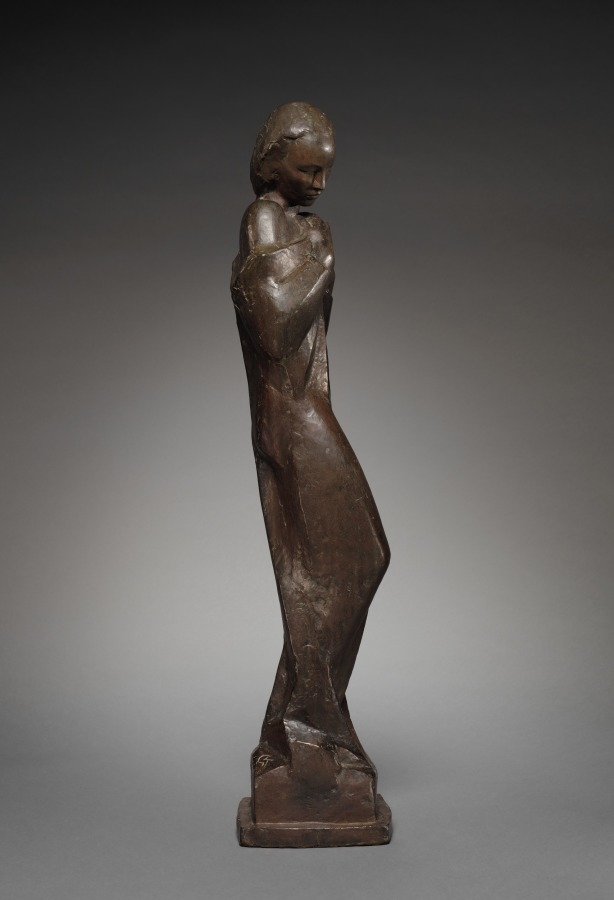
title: Adagio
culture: Germany, 20th century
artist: George Kolbe (German, 1877–1947)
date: 1923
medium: gilt bronze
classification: Sculpture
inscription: Signed lower left corner: "GK II"